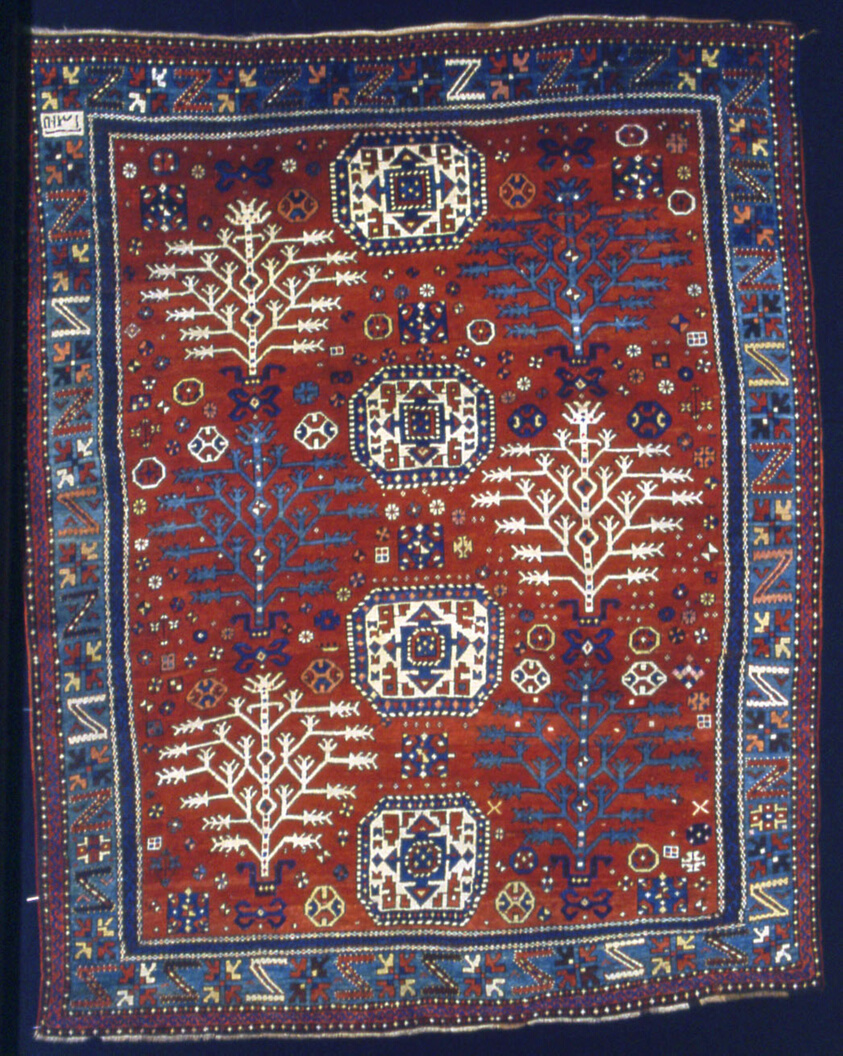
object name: Textile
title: Garden rug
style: kazak, caucasian, central asian, asian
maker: Caucasus, Kazakhstan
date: 1890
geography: Kazakhstan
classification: textile; weaving - rug; weaving